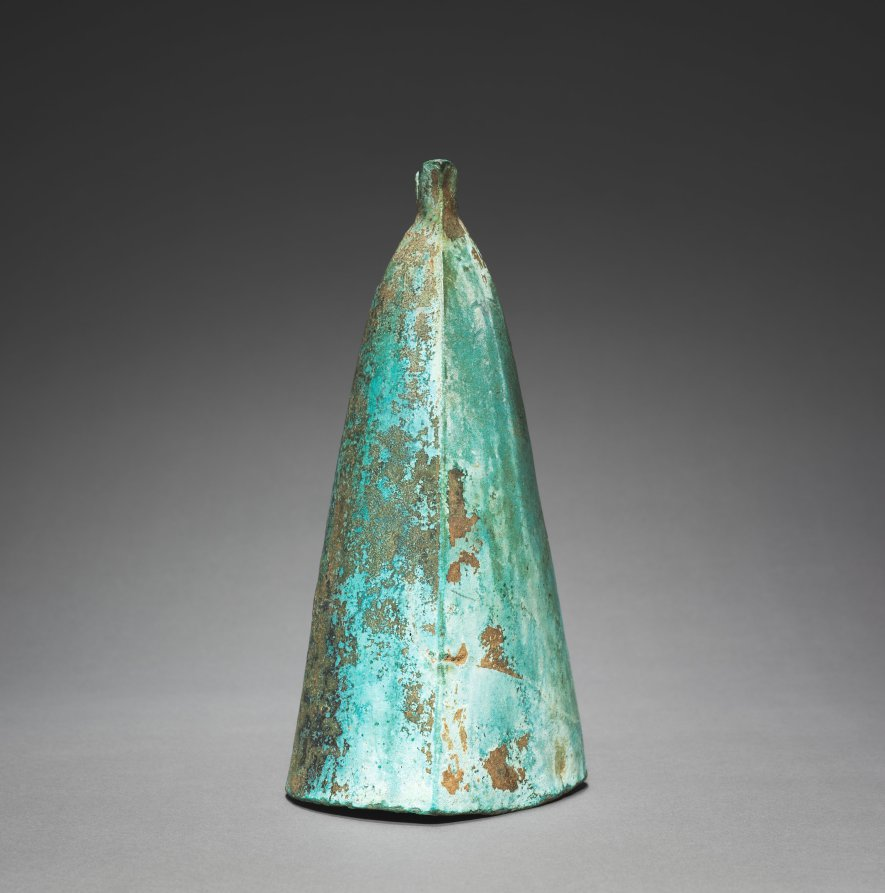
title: Bell with Diamond-Shaped Insignia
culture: China, along the southern borders, Eastern Zhou dynasty (770–256 BCE) to Han dynasty (202 BCE–220 CE)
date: 300s–100s BCE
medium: bronze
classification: Metalwork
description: These rare, elegant bronze bells were made in a tribal village along the southern borders of China. They differ greatly from bells made in the central regions, which often come in large sets and in varying sizes, and feature complex decorative patterns. The distinctive shape of these bells resembles a tall helmet topped by a pair of horns. A rope may have been tied around the horns so that the bells could be suspended. Each bell is decorated with a diamond-shaped insignia—probably to mark tribal affiliation. Although the bells are identical in size, each produces a different tone, which indicates that their casting was a highly refined process.